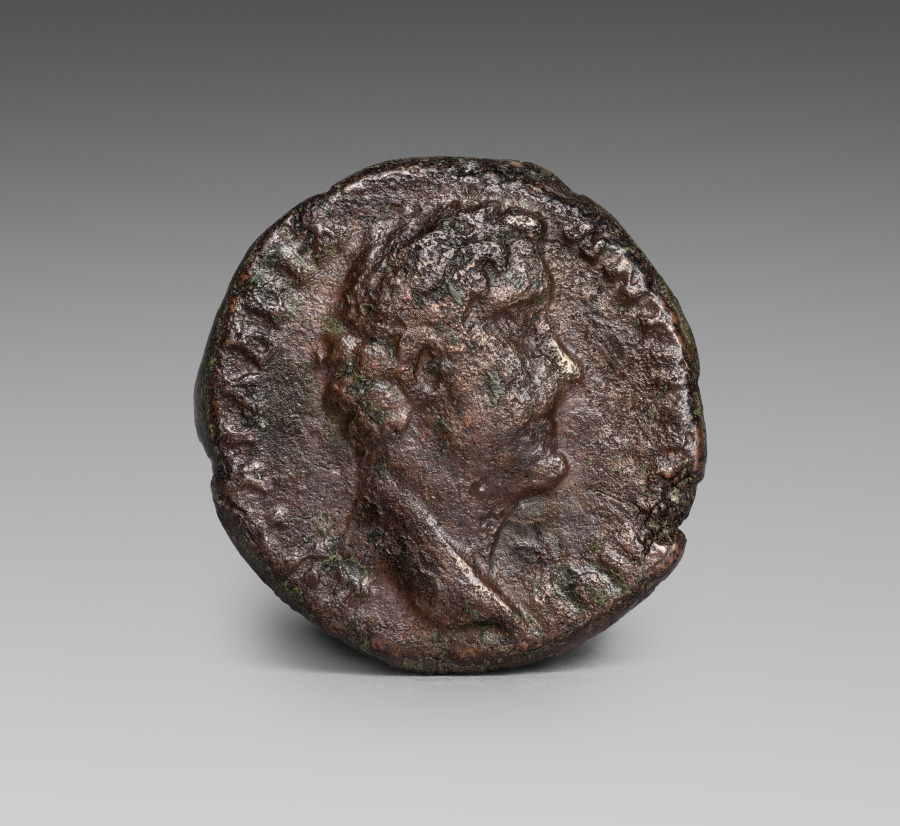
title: As: Head of Antoninus Pius, Laureate (obverse)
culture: Roman, minted at Nikopolis He Pros Istron (Moesia Inferior)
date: 138–61 CE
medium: bronze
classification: Coins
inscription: ΑV Τ ΑΙ ΑΔΡΙΑ ΑΝΤ[ΩΕΙΝΟΣ]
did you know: Antoninus Pius, shown on this coin, was Roman emperor from AD 138 to 161. He was one of the Five Good Emperors in the Nerva–Antonine dynasty and the Aurelii.